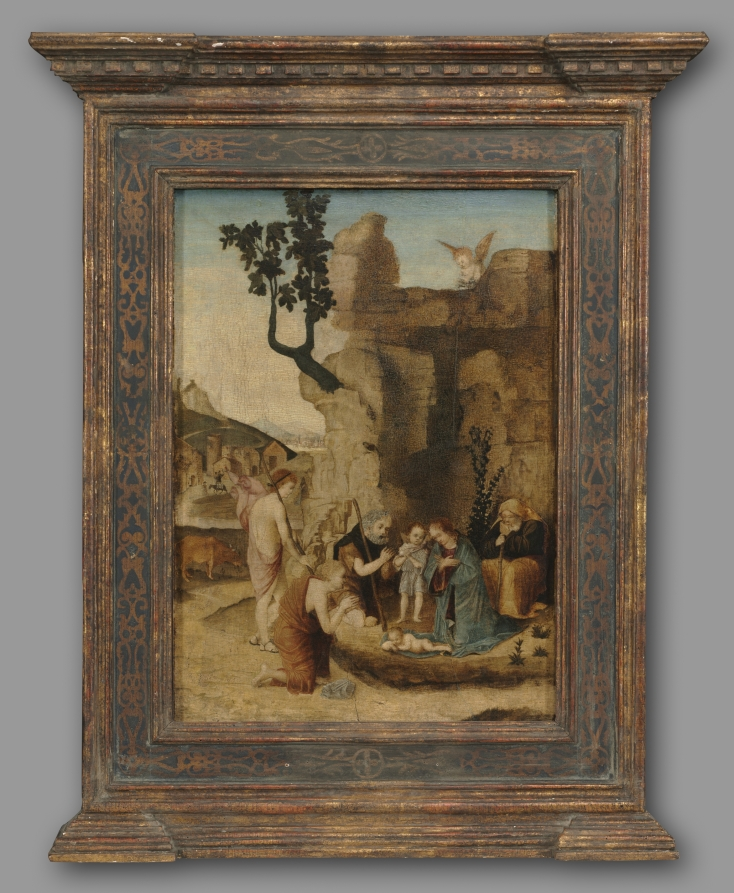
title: Adoration of the Shepherds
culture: Northern Italy, late 15th-early 16th Century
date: c. 1500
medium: oil on wood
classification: Painting